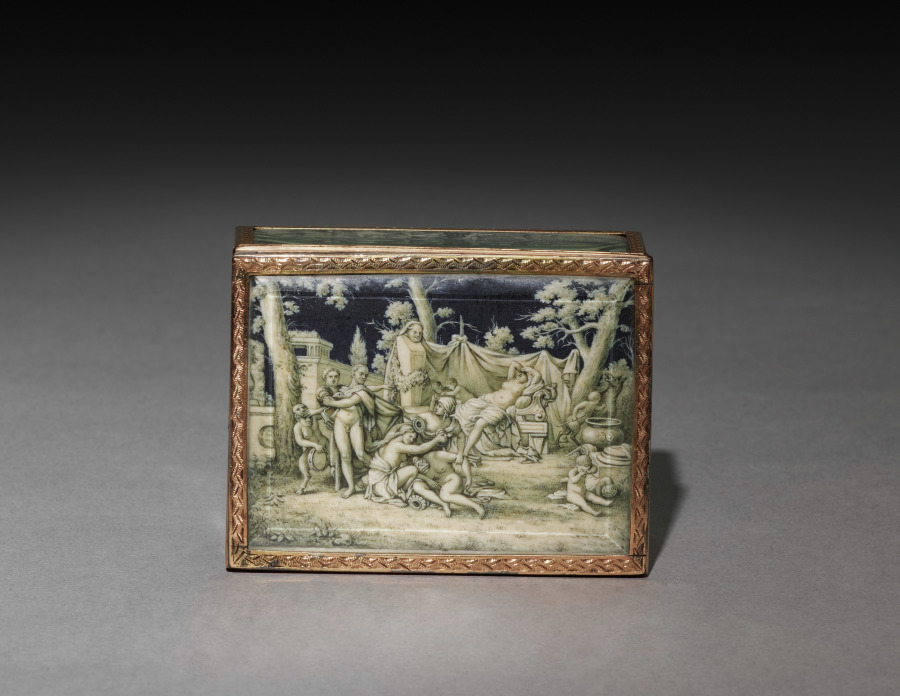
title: Box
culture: France, 19th century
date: 1800s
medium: painted miniatures under glass mounted in gold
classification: Miscellaneous